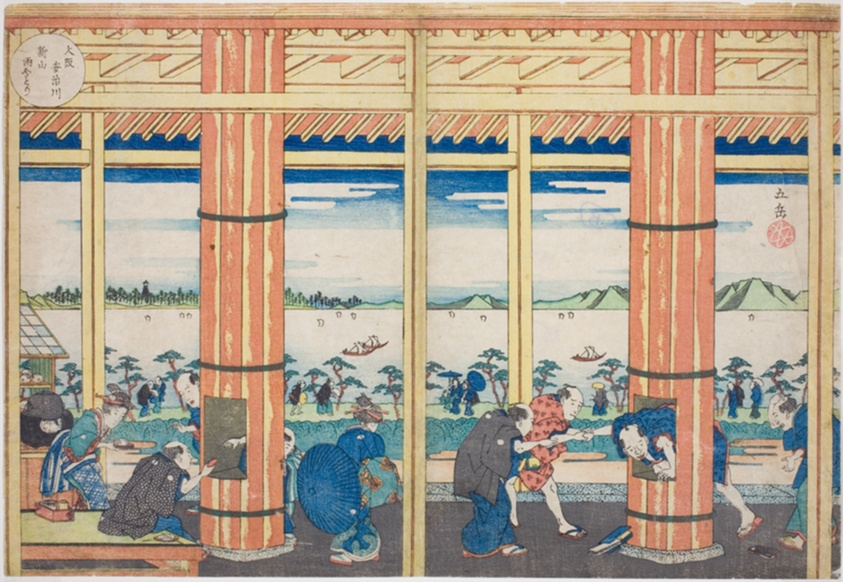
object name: Print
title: The Rain Shelter at Nii Hill by the Aji River, Osaka (Osaka Ajigawa Niiyama amayadori), from the series "Famous Places in Osaka: Fine Views of Mount Tenpo (Naniwa meisho Tenpozan shokei ichiran)"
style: Japanese (culture or style)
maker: Yashima Gakutei (Japanese, 1786 (?)-1868)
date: c. 1834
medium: Color woodblock print; oban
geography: Japan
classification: woodblock print; print; asian art